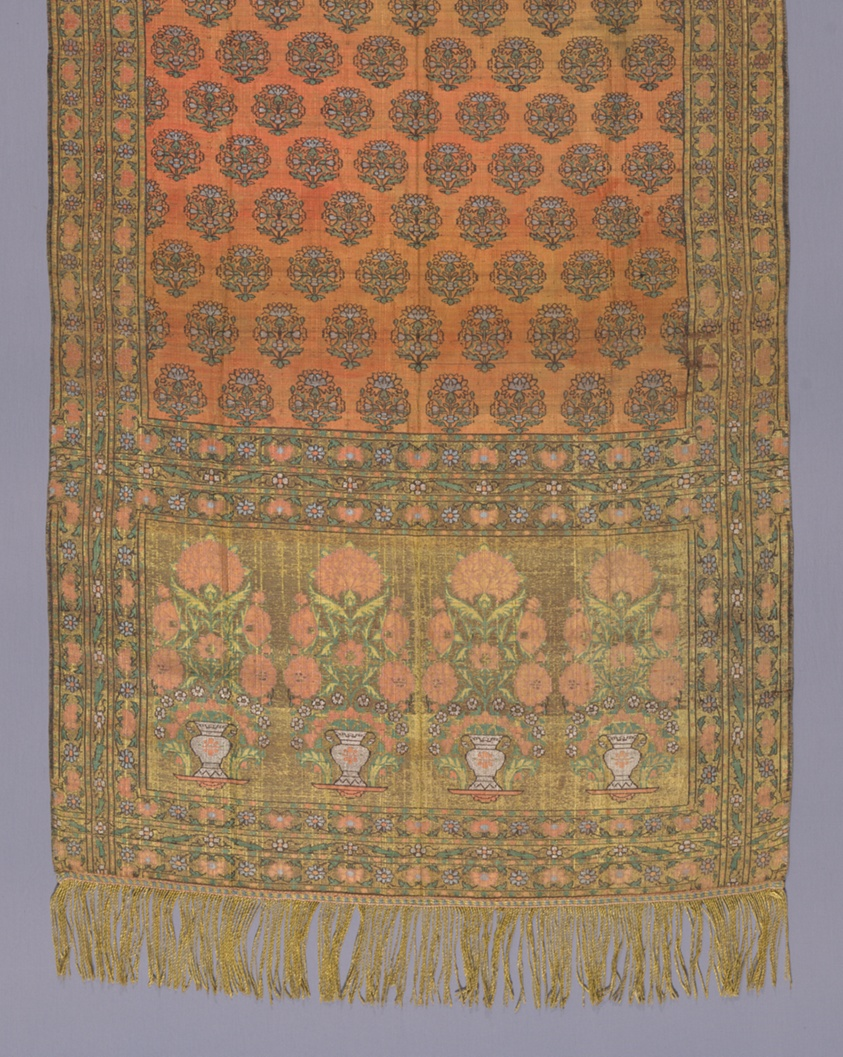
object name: Costume and Accessories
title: Man's Waist Sash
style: 18th Century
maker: Made in Iran or Poland for the Polish market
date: 18th century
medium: Silk compound weave, with applied silk and metal fringe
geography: Iran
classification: costume; weaving; dress (garment); clothing; textile; costume accessory worn at waist or below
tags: floral motifs, flowers, vase, geometric, floral, rectangles, stripes, nobility